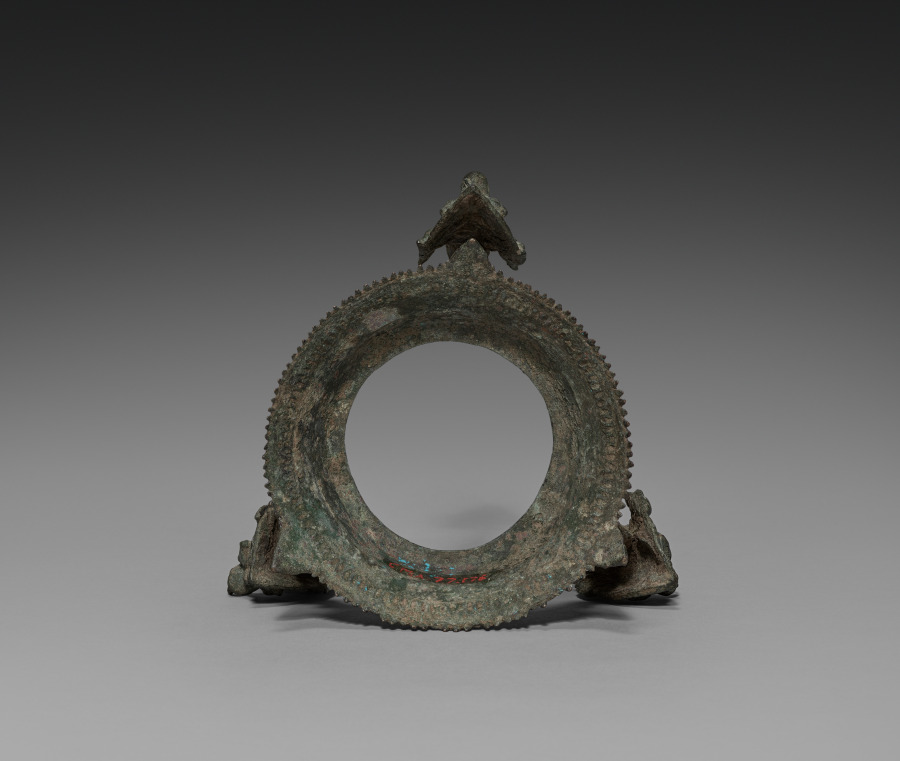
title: Tripod stand with nagas for a ritual conch shell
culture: Cambodia, Khmer, Angkor Period, 12th-13th Century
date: 1100s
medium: shell and bronze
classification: Sculpture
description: A royal temple like Banteay Chhmar was built for performing rituals and to honor images of gods, Buddhas, and other sacred or enlightened beings for the sake of the kingdom’s protection and ongoing prosperity. Conch shells were blown at the start of rituals to make the sound corresponding to the syllable om. The dancing figure of Hevajra, a Buddhist being of enlightenment with eight heads, sixteen arms, and four legs, has been worked into the bronze embellishment of the shell. Hevajra was elevated to a prominent position in Khmer Buddhism of the Angkorian period as the standard figure denoting the practice of rituals prescribed in a text called the Hevajra-tantra. The tripod stand with three serpents is probably not original to the shell.